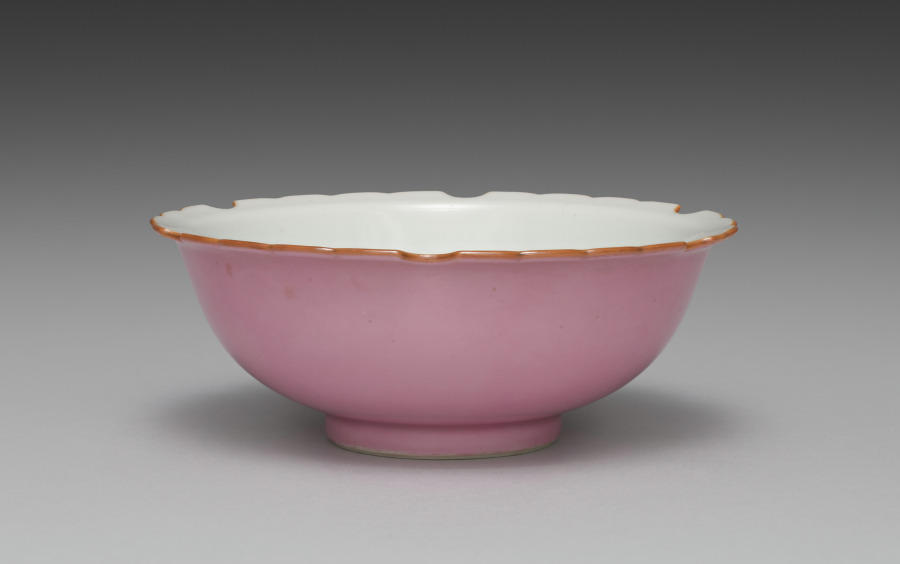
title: Dish from Snow-Flake Side Dishes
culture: Japan, Meiji period (1868–1912)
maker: Seifū Yohei III (Japanese, 1851–1914)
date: 1893–1914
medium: One from a set of six porcelain dishes; porcelain with lobed rims and pink glaze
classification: Ceramic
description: According to the box lid, this set of 6 side dishes, or mukōzuke, are “snow-flower style” (sekkashiki), having mouths shaped like snowflakes. Their mouths, which have 6 lobes and scalloped edges, are traced with brown iron oxide at the rim. The outside of each bowl is glazed with a very bright pink over the basin and foot, and the inside is left white. From directly above, one sees a snowflake-like shape, and from the side, they seem to float above a rosy ground.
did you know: The box for this set of dishes has an inscription on the side noting that they were for a person with the family name Nakamoto.